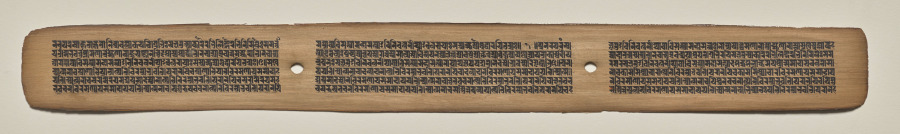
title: Text, Folio 114 (recto), from a Manuscript of the Perfection of Wisdom in Eight Thousand Lines (Ashtasahasrika Prajnaparamita-sutra)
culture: Eastern India, Bihar, Vikramashila Monastery. Painting: Nepal, Kathmandu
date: Sunday, September 14, 1119 (year 239 of the Newar Samvat in the month of Ashvina)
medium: gum tempera and ink on palm leaves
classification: Painting